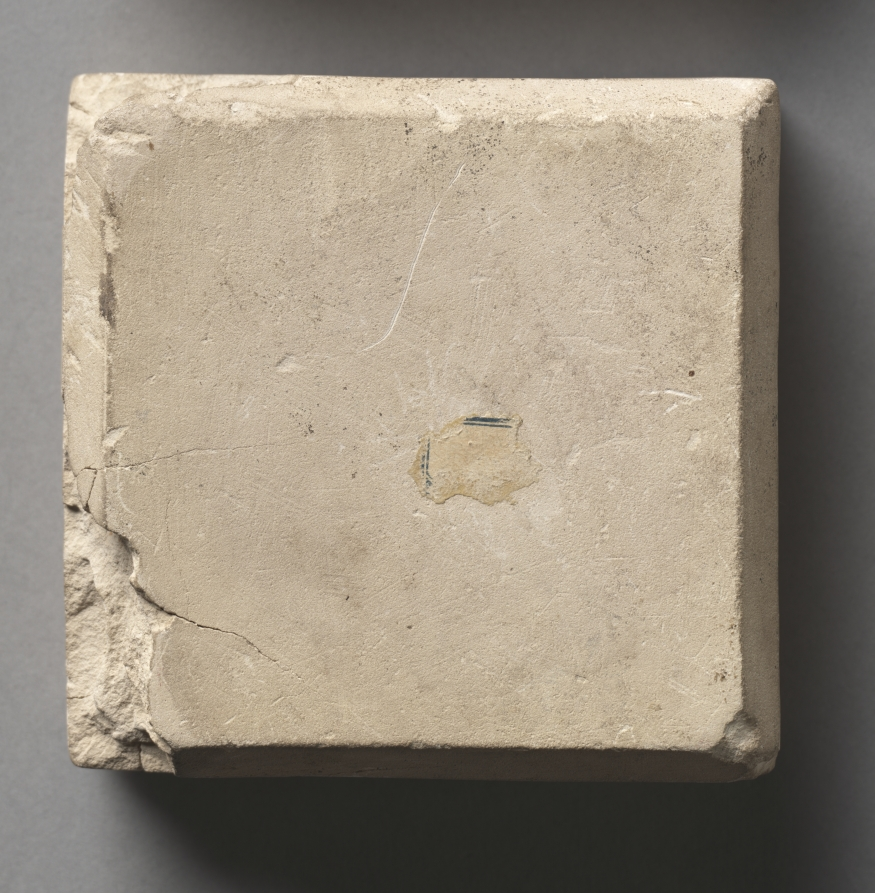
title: Mold in Two Parts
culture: Egypt, Greco-Roman period (332 BCE–395 CE), Ptolemaic dynasty (305–30 BCE) or later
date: 305–30 BCE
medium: limestone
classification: Sculpture